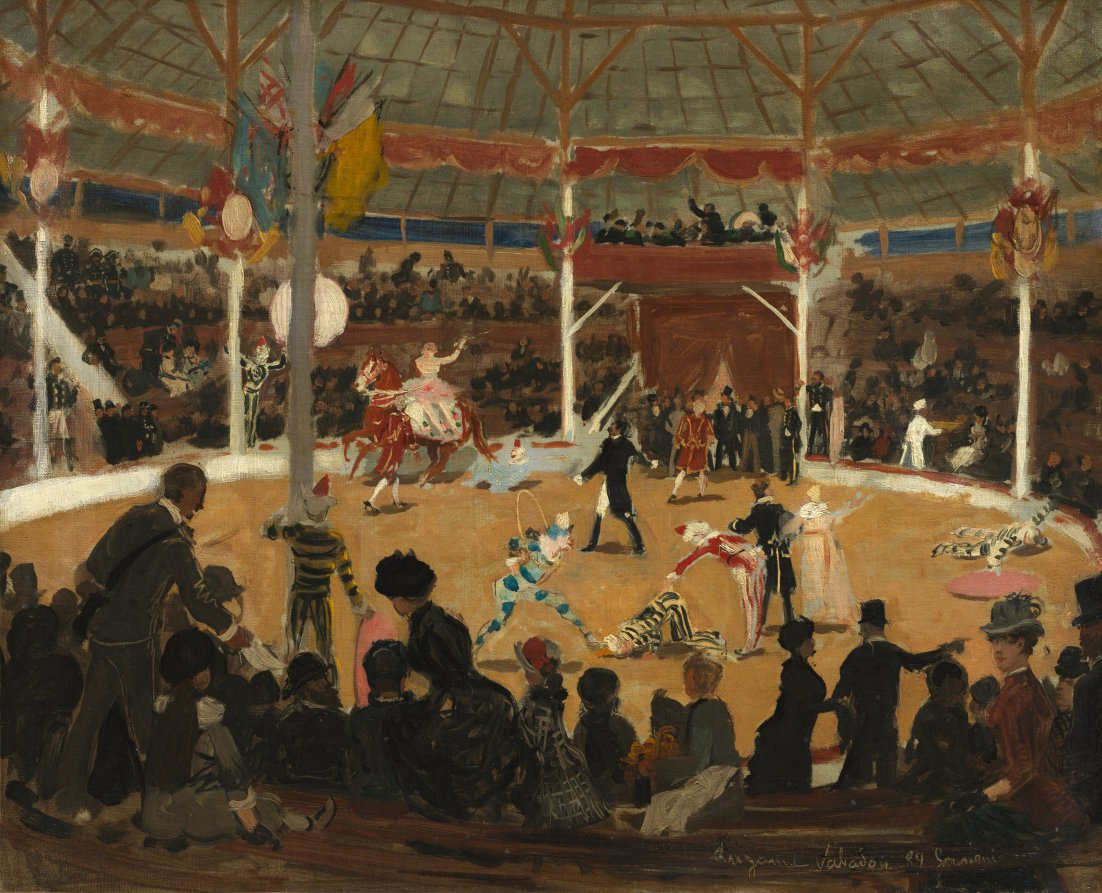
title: The Circus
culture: France, 19th century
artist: attributed to Suzanne Valadon (French, 1865–1938)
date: 1889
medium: oil on fabric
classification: Painting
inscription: Signed lower right, carved into wet paint with blunt end of brush: Suzanne Valadon 89 Souvenir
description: The attribution of this painting to Suzanne Valadon has been rejected by several authorities. Others support the attribution, arguing that the painting is merely atypical because it is an early work, signed and dated 1889. Valadon did not begin to develop her mature style until 1891.She was the mother of artist Maurice Utrillo and a prolific painter herself, although she never received any formal artistic training.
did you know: Besides being a prolific painter, Suzanne Valdon served as the model for Pierre-Auguste Renoir and Henri de Toulouse-Lautrec.